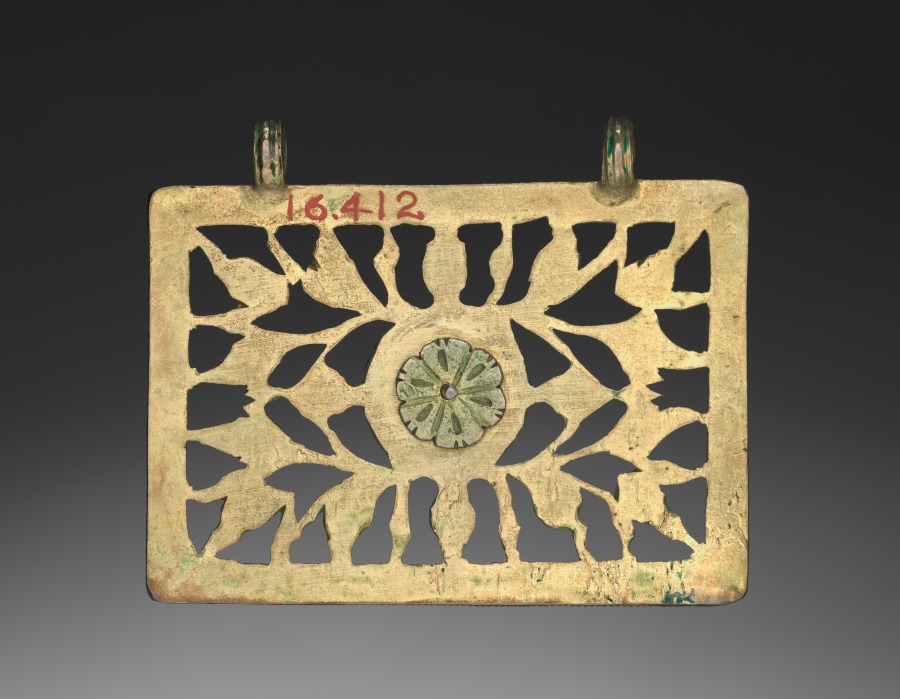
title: Pendant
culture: India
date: early 1900s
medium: silver gilt with rubies and diamonds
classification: Jewelry